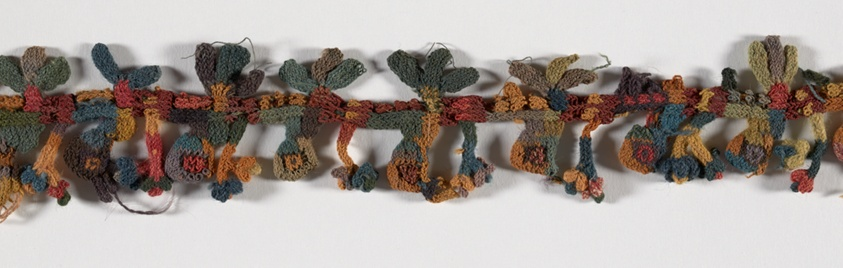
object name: Textile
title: Border Fragment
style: nazca, andean, andes, Pre-Columbian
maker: Nazca; South coast, Peru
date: 100 B.C./A.D. 200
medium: Wool (camelid), tubular cross-knit looping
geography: Peru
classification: textile; weaving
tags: super/natural